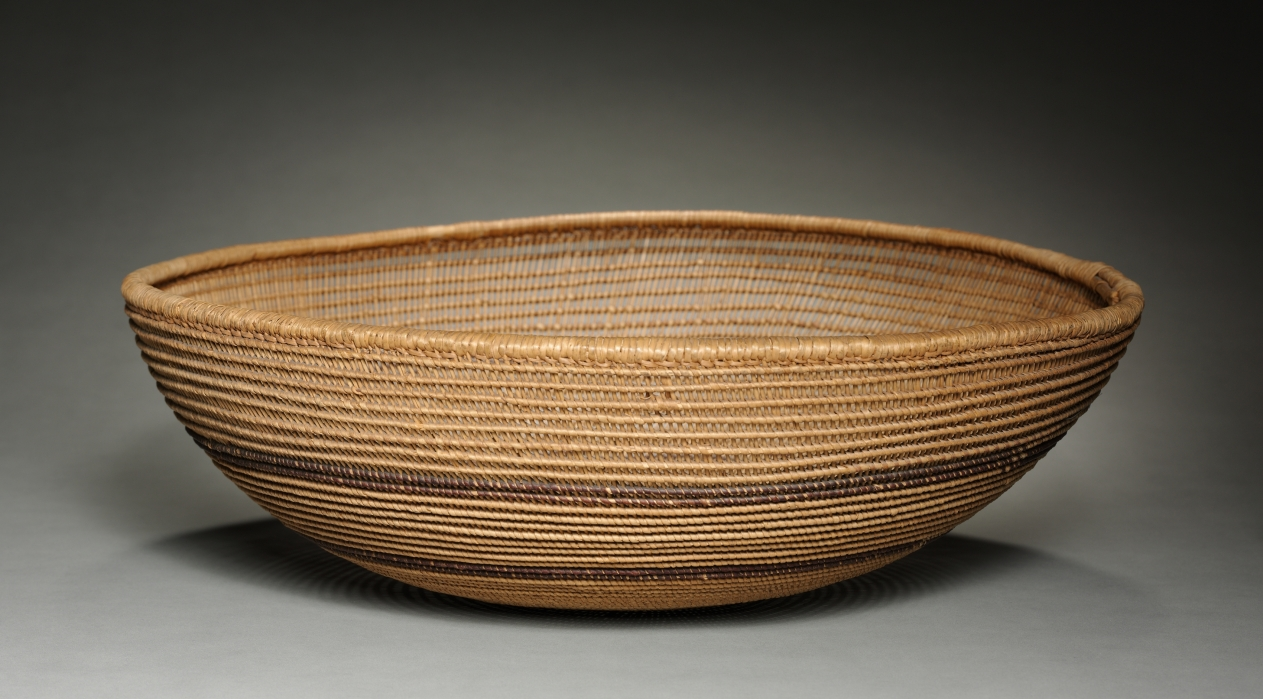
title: Tray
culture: California, Pomo, late 19th- early 20th century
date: 1895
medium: plain twine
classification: Basketry